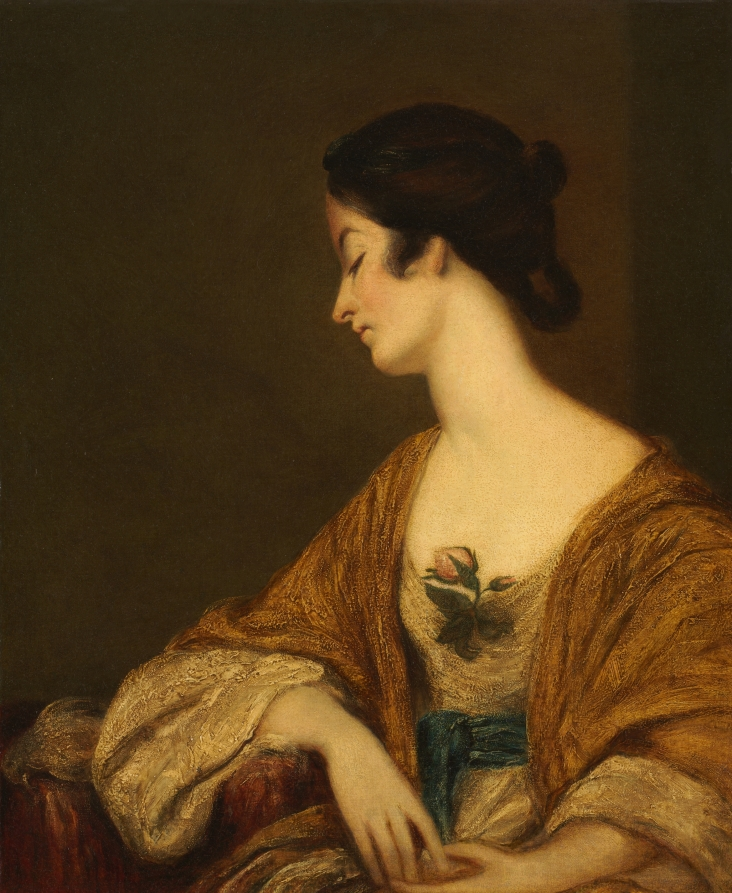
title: Portrait of Mrs. George Collier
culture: England, 18th century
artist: follower of Joshua Reynolds (British, 1723–1792)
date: 18th century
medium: oil on canvas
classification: Painting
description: Given to the Cleveland Museum in 1920 by the collector Jeptha H. Wade, this painting was thought to be an authentic work by Joshua Reynolds. However, after considerable study, the museum attributed it to a follower of Reynolds working in a similar style around the same time. This portrait depicts the wife of the captain (and later admiral) George Collier. The artist draws an analogy between this woman and Lesbia, a married woman who provided much artistic inspiration for the Roman poet Catullus (c. 84–c. 54 BC). The poet's writings document a love affair with Lesbia, and one poem in particular documents the death of the woman's beloved pet sparrow. The viewer can barely see the sparrow in this painting, since it lies on a table partially obscured by her right elbow. The muted colors evoke a sense of melancholy as the woman mourns with her head turned away from the viewer.